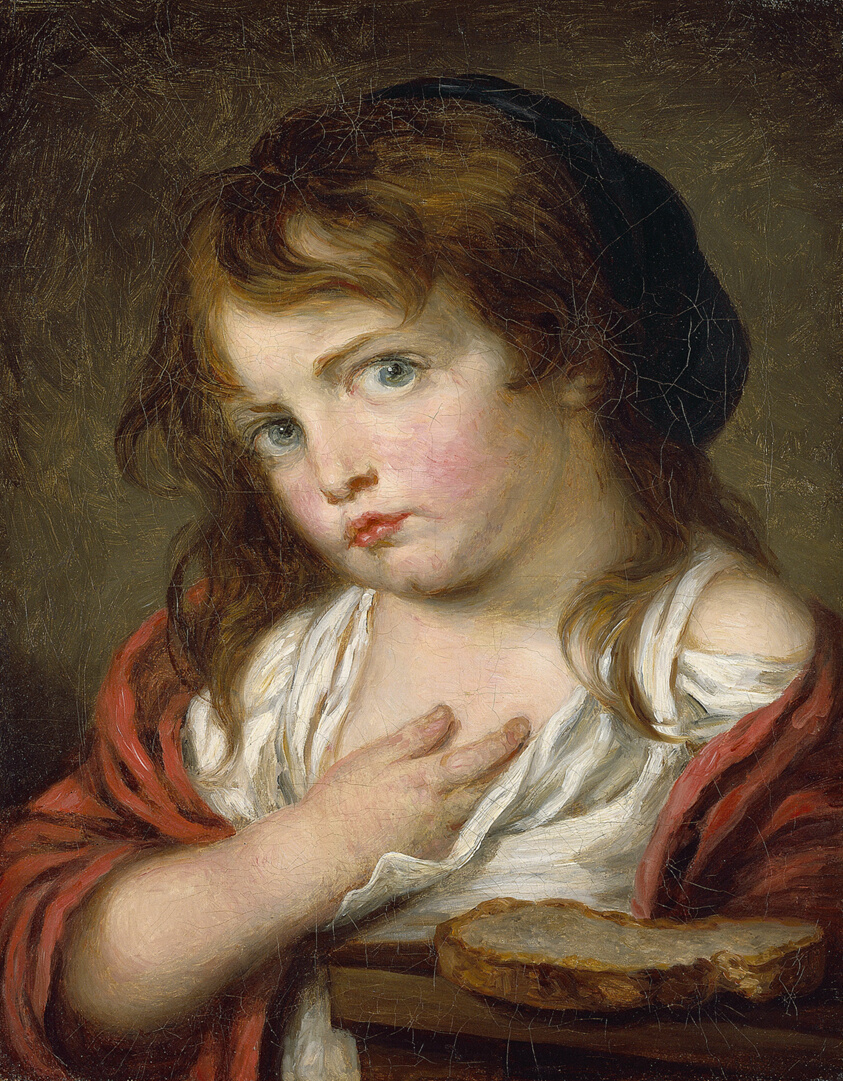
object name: Painting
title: Little Girl Pouting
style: 18th Century, 19th century, nineteenth century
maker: Follower of Jean Baptiste Greuze (French, 1725–1805)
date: 1775/1800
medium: Oil on canvas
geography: France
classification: oil on canvas; french; oil paintings (visual works); paint; portrait; painting; european painting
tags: girl, white (color), red (color), food, Bread, sadness, children